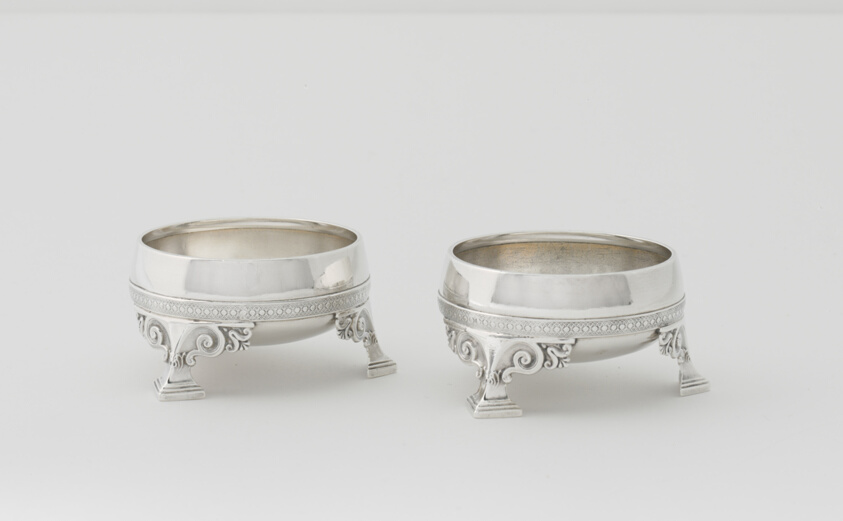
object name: Metalwork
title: Pair of Salt Dishes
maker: Tiffany and Company (American, founded 1837); New York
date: c. 1867–68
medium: Silver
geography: New York City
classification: saltcellar; silver; american decorative arts; american arts; decorative arts